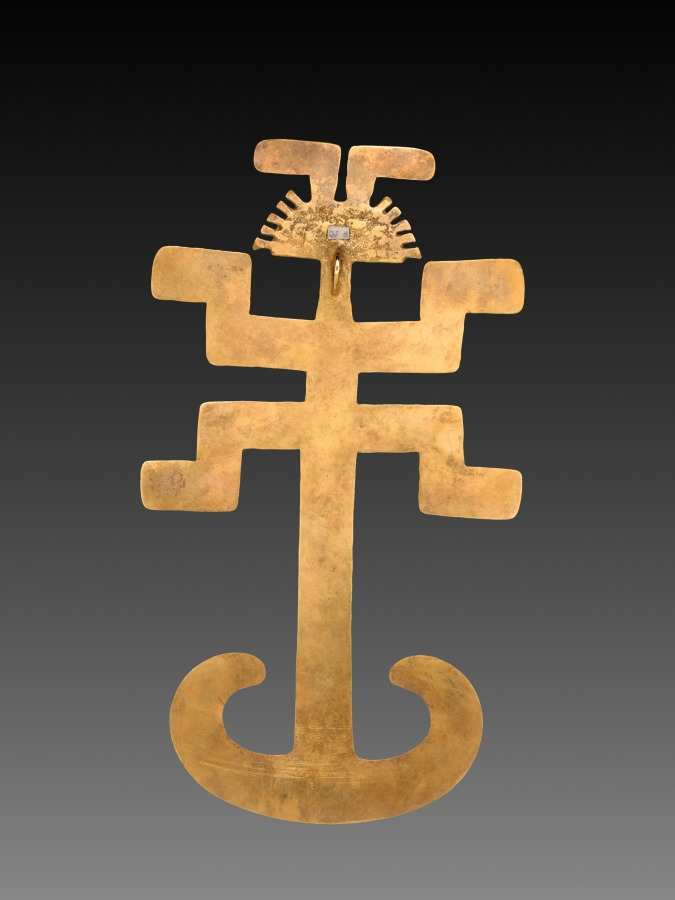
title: Figural Pendant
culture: Isthmian Region (Colombia), Tolima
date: 1–800 CE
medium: gold, cast and hammered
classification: Metalwork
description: Colombia's Tolima region is justly famous for arrestingly abstracted figures like this one, among the largest of its kind. Such figures, worn as necklace pendants by chiefs and other elites, seem to be based on the human form. But they also incorporate animal features, often an upturned, bifurcated tail sometimes compared to that of a serpent and large, angled head appendages that may refer to animal ears or even insect antennae.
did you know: Pendants in the form of figures with X-shaped bodies are an iconic Tolima type.